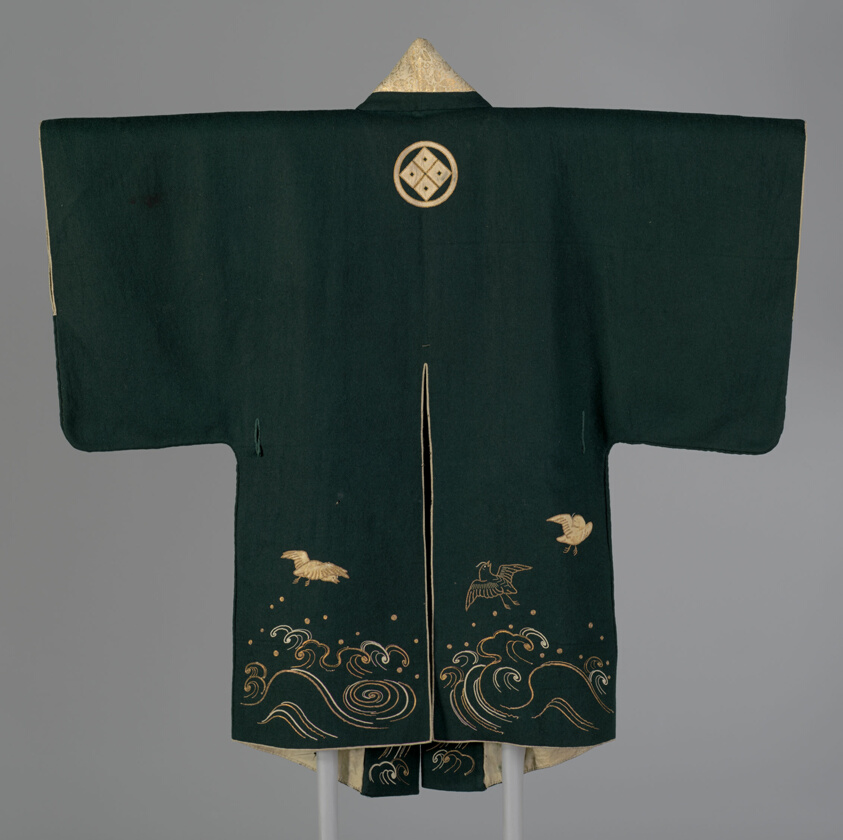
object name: Costume and Accessories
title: Short Coat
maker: Japan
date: 1801/50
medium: Wool, plain weave, fulled (gorofukuren); appliquéd with silk, plain weave with supplementary pile warps forming solid velvet; embroidered with silk, gilt-strip-wrapped-silk; silk and gilt-paper-strip, twill weave with secondary binding warp and patterning weft; lined with silk, plain weave; edged with silk and gilt-paper-strip, twill weave with secondary binding warps and patterning wefts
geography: Japan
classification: needlework - costume; weaving; costume